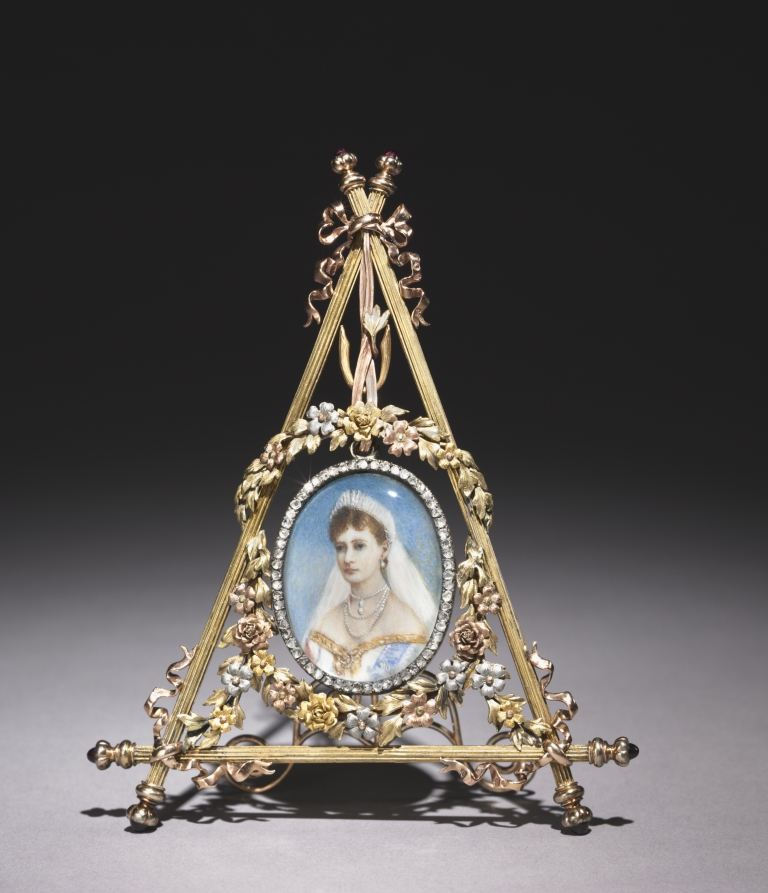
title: Framed Miniature of Tsarina Alexandra Feodorovna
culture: Russia, St. Petersburg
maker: House of Fabergé (Russian, 1842–1918)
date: 1896–1908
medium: gold, rubies, diamonds, gouache, ivory, glass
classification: Portrait Miniature